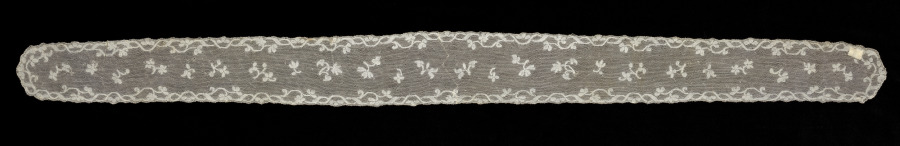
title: Lace Lappet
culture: France, Valenciennes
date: 1700s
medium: Linen: bobbin Lace (Valenciennes)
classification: Lace